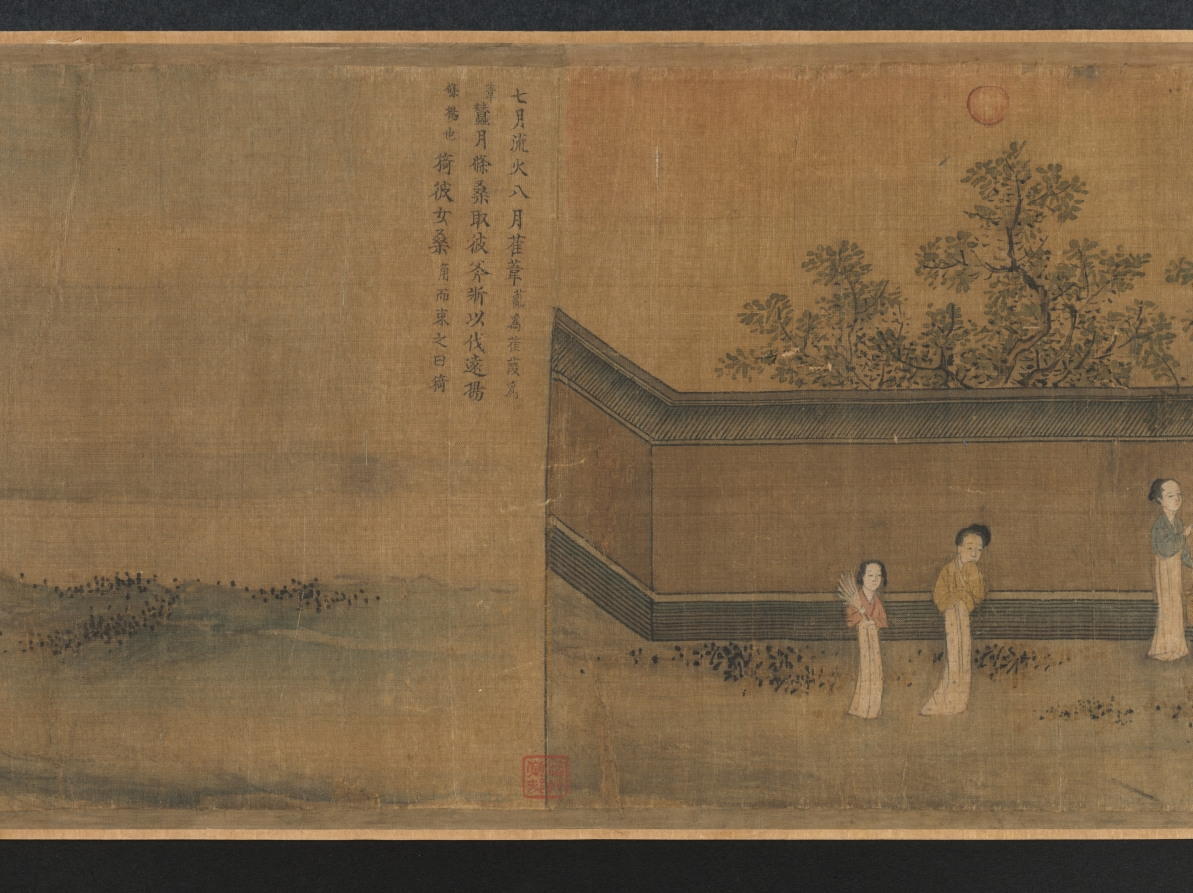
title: "Seventh Month" from the Odes of Bin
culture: China, Southern Song dynasty (1127-1279)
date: 1200s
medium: Handscroll; ink and color on silk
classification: Painting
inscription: Colophons: 1. [on the frontispiece] by the Qianlong emperor (dated 1741). 2. by Lu Wan (dated Zhengde dingchou, 1517). 2. by the Jiaqing emperor (dated 1807).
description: According to Confucian thought, the ruler looks after the well-being of his people which involves agricultural activities. Seventh Month from the ancient Odes of Bin in the Shijing (Book of Poetry) describes occupations throughout the year, including plowing, harvesting, hunting, making clothes, and observing rituals. The earliest illustrations of these Odes accompanied by text were commissioned by Southern Song emperor Gaozong (reigned 1127–1162). As the lower Yangzi delta had become the new seat of government, Gaozong had sets of these illustrations produced by court artists to revive the dynasty and convince the Confucian officialelite of his legitimacy to rule.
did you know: The Odes of Bin appears in the classic Shijing (Book of Poetry), an anthology of more than 300 poems, folk songs, and ceremonial hymns that were originally chanted to music.